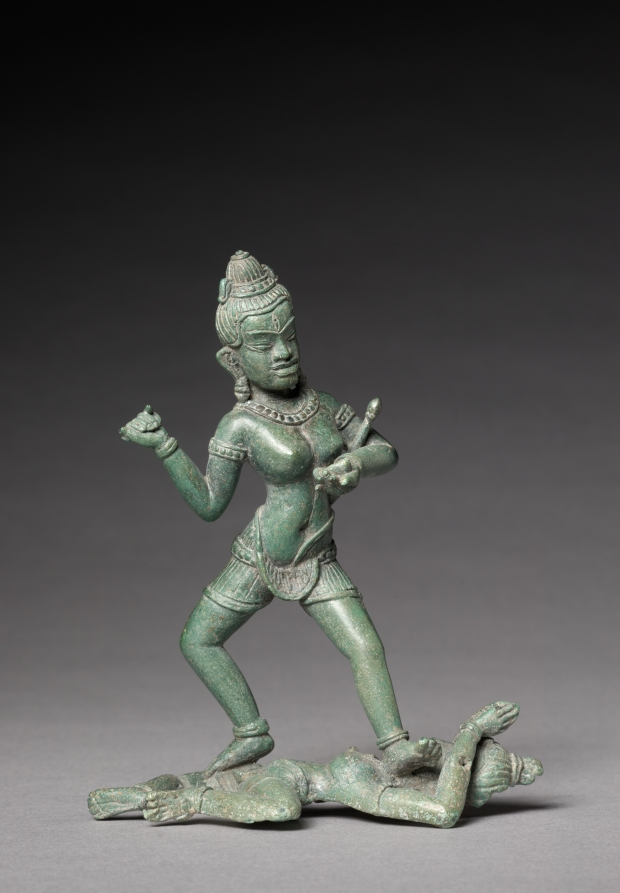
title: A Dakini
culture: Cambodia, Angkor, 11th century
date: c. 1100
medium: bronze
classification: Sculpture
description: An extremely rare bronze of a tantric Buddhist deity depicts the trampling of the personifications the of the afflictions that keep beings cycling around the world of samsara, moving from one unhappy birth, death, and rebirth to another. This female deity appears to hold a skull cup in her left hand, with a mace in the crook of her elbow, and she grasps an unclear object that may be a flaying knife in her upraised right hand.